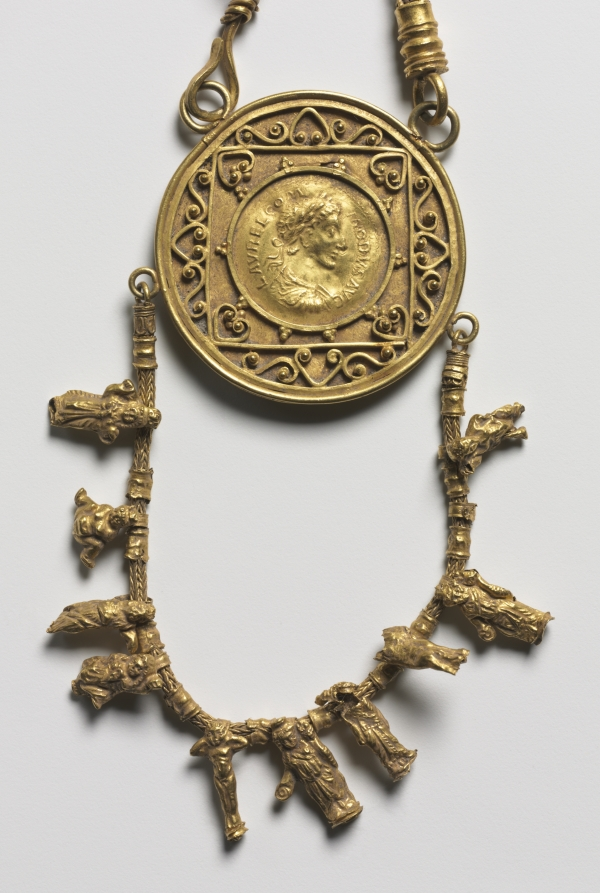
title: Collar with Medallion and Pendant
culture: Egypt, Alexandria, Roman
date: Collar: c. 200–300 CE, Coin: c. 177 CE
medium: gold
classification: Jewelry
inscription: "L. AUREL. COM.MODUS AVG."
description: This necklace is an amalgamation of several different pieces. A thick gold chain is attached to a central medallion, which holds a coin of the Roman emperor Commodus in its center, possibly an ancient replica. A second pendant chain is attached to the bottom of the medallion, strung with ten tiny amulets representing figures of gods, goddesses, and theatrical actors.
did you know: The undamaged pendant figures include, among others, Baubo, Serapis, Isis-Demeter, and a dwarf (perhaps a comic actor).